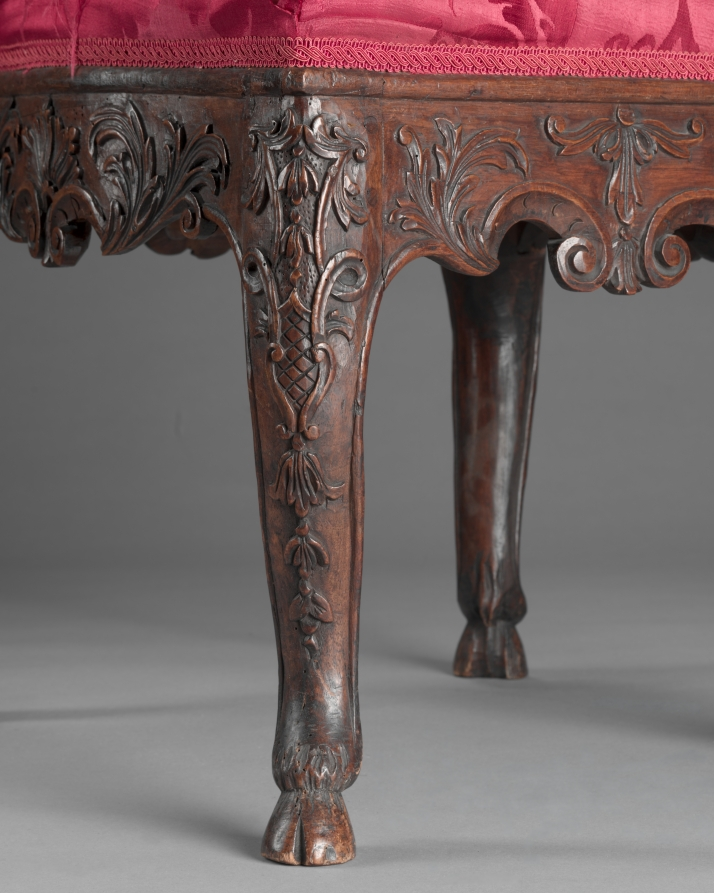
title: Side Chair (1 of 2)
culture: Germany, Belgium, or the Netherlands, early 18th century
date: early 1700s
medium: walnut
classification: Furniture and woodwork